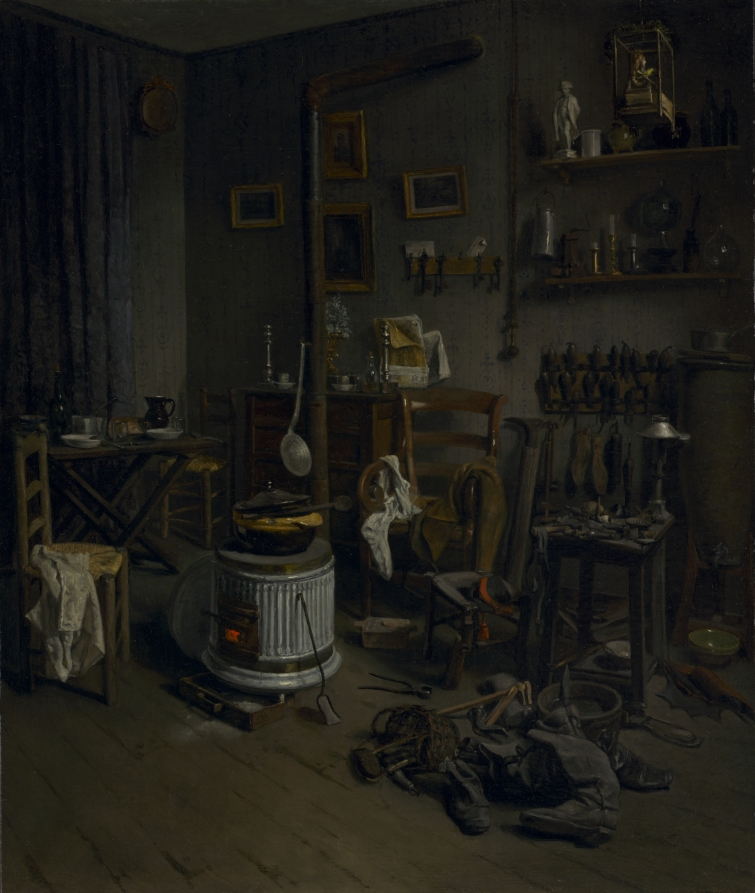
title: Cobbler's Quarters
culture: France, 19th century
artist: Jean-Alphonse Duplessy (French, 1817–after 1872)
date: 1860s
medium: oil on fabric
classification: Painting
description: This modest room is both the professional and personal domain of its inhabitant. Although the cobbler himself is not represented, he is nevertheless portrayed through all the details of his daily life. On the floor two pairs of boots wait to be repaired, surrounded by craftsman's tools. The pot-bellied stove in the middle of the room provides both heat and a place for cooking meals to be eaten at the folding table in the background at the left. The curtain behind the table probably hides an alcove with the cobbler's bed. A small statuette of Napoleon on the shelf at the upper right suggests the cobbler's political views. Next to it hangs a cage containing a green parakeet. Today the bird would undoubtedly be replaced by a radio, a necessary fixture to keep manual laborers company as they work. Little is known of Duplessy, who studied and worked in Paris, except that he concentrated on still-life painting. His interest in this subject can be seen in the careful rendering of object groupings in this scene. No records of the artist's life exist after 1872, the last year his work was shown at the annual Salon exhibition.